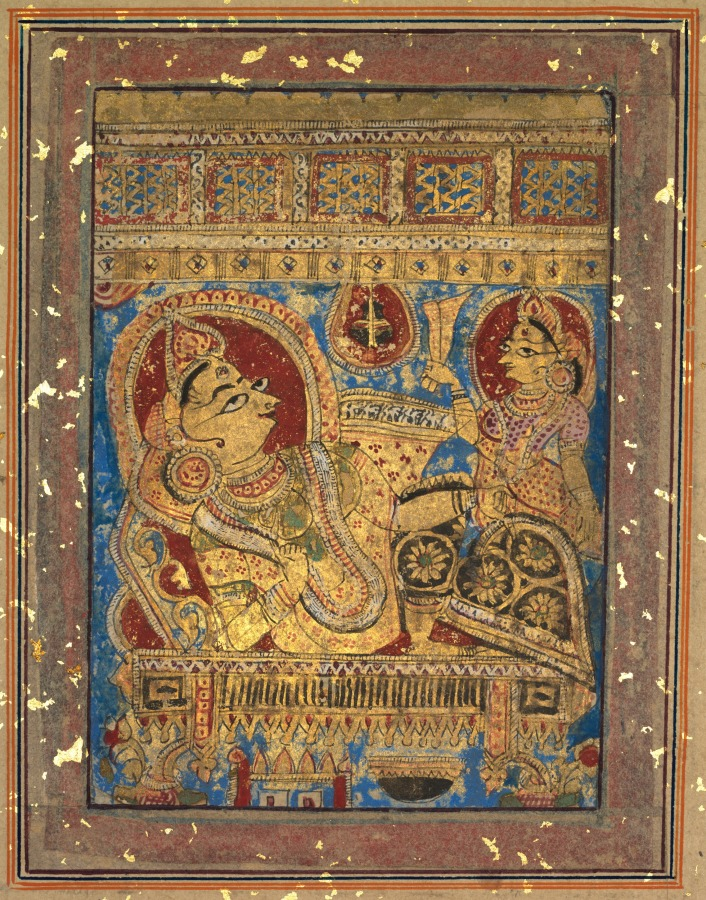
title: Painting from a Kalpa-sutra: Queen Trishala Reclining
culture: Western India, Gujarat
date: c. 1450–75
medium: Gum tempera and gold on paper; 18th century gold flecked border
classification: Painting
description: Until recently, and especially during the 1800s and early 1900s, the paintings in South Asian manuscripts were excised and mounted as individual works of art. These two paintings from a Jain manuscript of the Kalpa-sutra have been separated from the text and mounted with gold-flecked borders, like pictures in an album.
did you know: Queen Trishala is enjoying a happy pregnancy with the Jina-to-be.